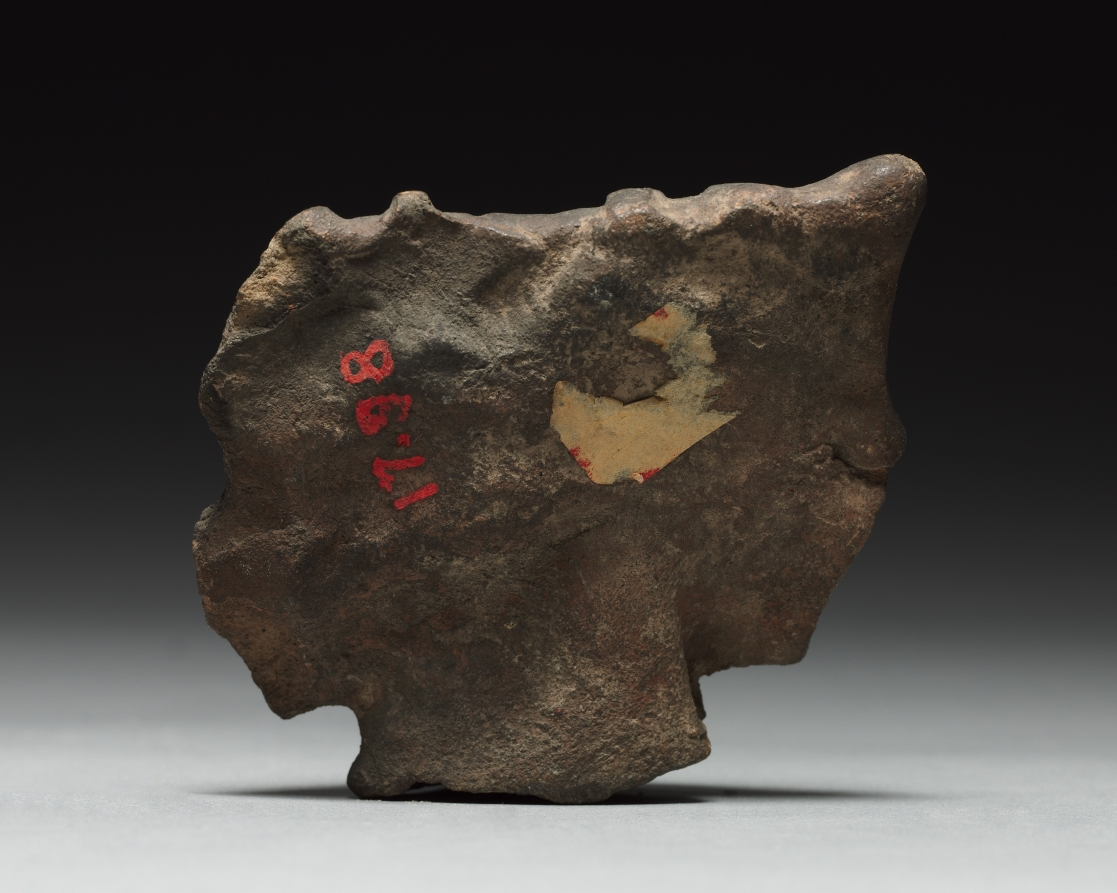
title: Head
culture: Mexico, 600-1000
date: 600–1000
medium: terracotta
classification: Ceramic